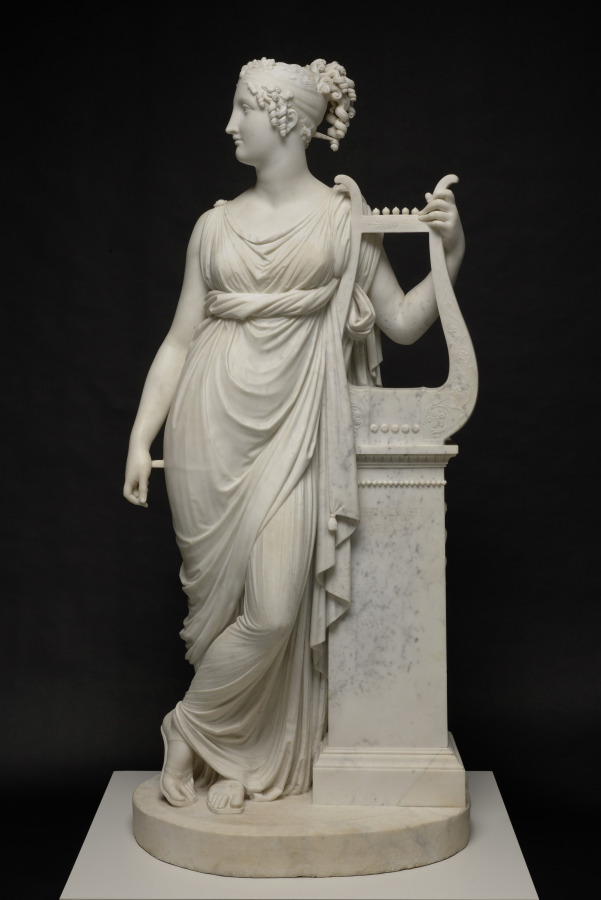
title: Terpsichore Lyran (Muse of Lyric Poetry)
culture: Italy, 19th century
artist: Antonio Canova (Italian, 1757–1822)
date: 1816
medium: marble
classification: Sculpture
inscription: inscribed on front of column: "Terpsichore Lyran" [Terpsichore as the Muse of lyric poetry]; inscribed at base of column: "Canova Fact: 1816"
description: In Greek mythology, Terpsichore was one of the nine Muses, or goddesses of creative inspiration. The lyre, the Greek inscription on the short column, and the caduceus (entwined snakes) on the side identify the figure as Terpsichore Lyran, muse of lyric poetry. This sculpture began with a commission from Napoleon's brother, Lucien, for an idealized portrait of his wife, Alexandrine. Antonio Canova made this version for a British aristocrat and exhibited it in 1817 at the Royal Academy in London to great acclaim.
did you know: Trained by his grandfather, an Italian stonemason, Canova began modeling clay and carving marble sculptures before age ten.